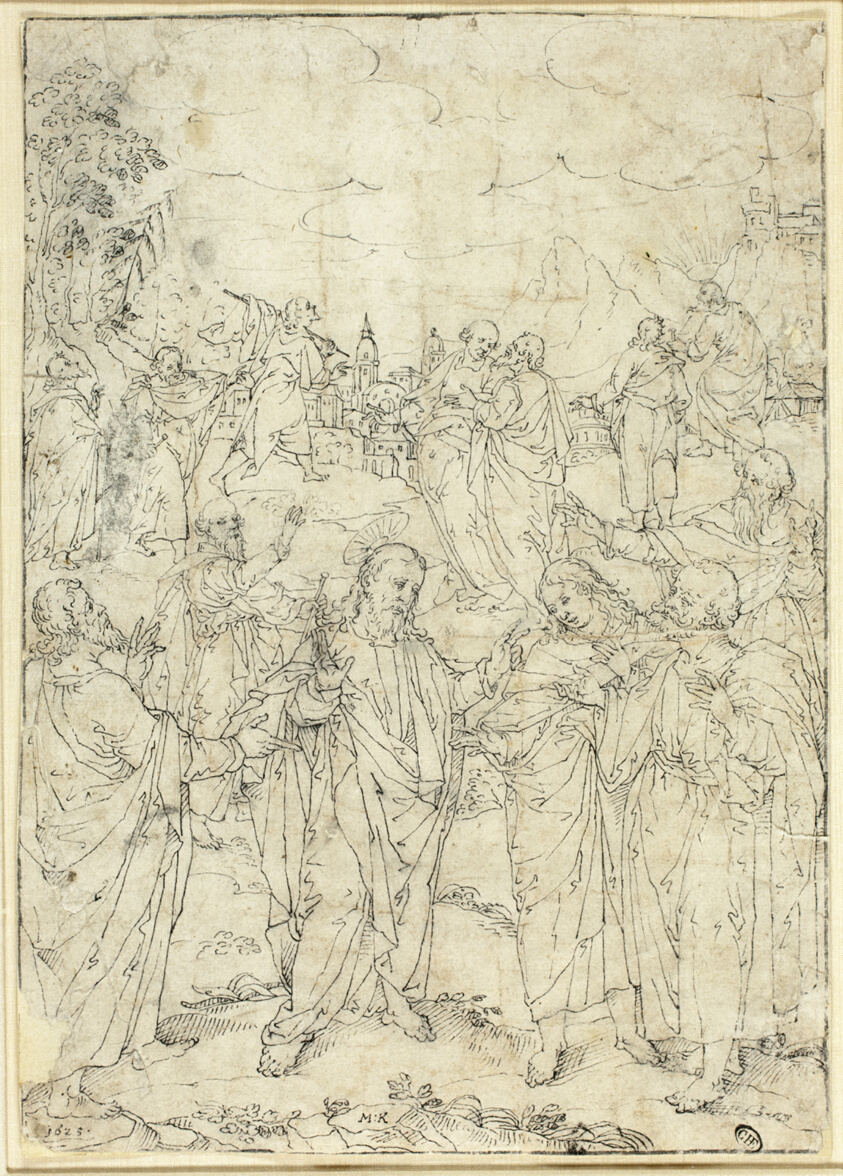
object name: Drawing and Watercolor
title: Christ and the Apostles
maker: Johannn Mathias Kager; German, 1566–1634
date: c. 1625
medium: Pen and black ink on ivory laid paper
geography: Germany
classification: pen and ink drawings; prints and drawing; paper